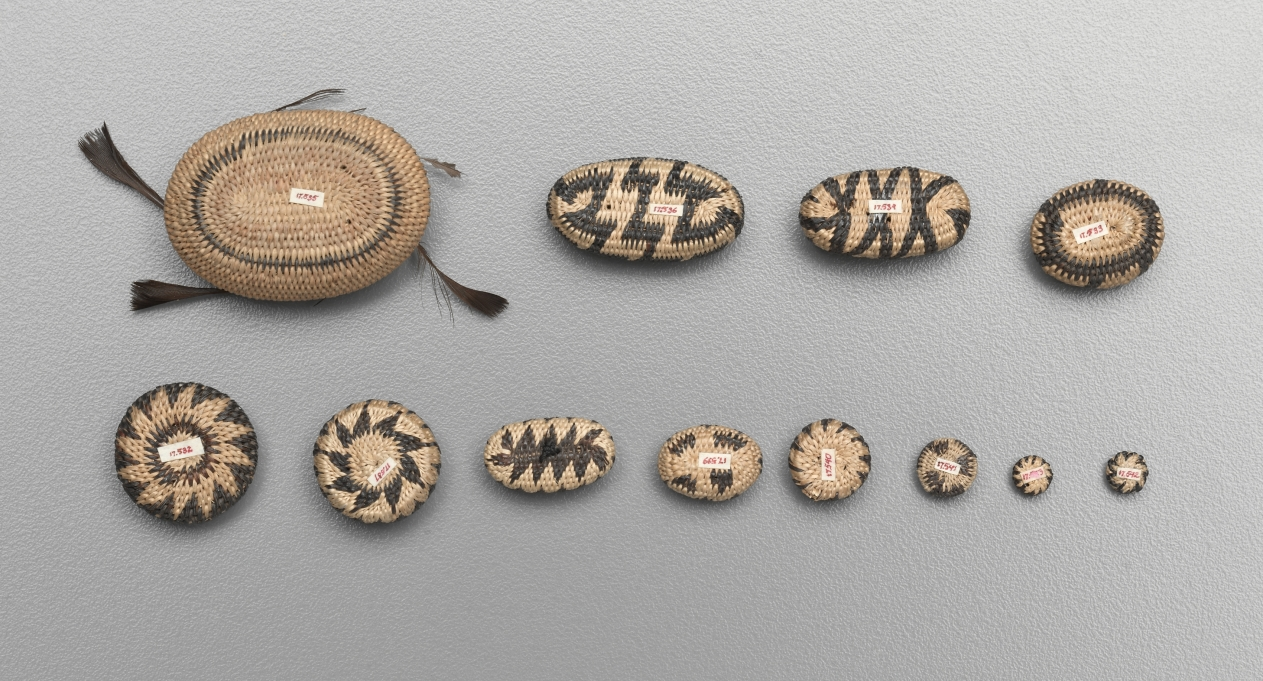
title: Miniature Oval Basket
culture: California, Pomo, late 19th-early 20th century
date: late 1800s-early 1900s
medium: plant materials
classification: Basketry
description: Miniature baskets were made to demonstrate the basket-maker’s virtuoso skill, and these tiny marvels seem to be no exception—the smallest are just a few millimeters wide but still patterned. For such fine work, dexterity was required as much for preparation of materials as for weaving.